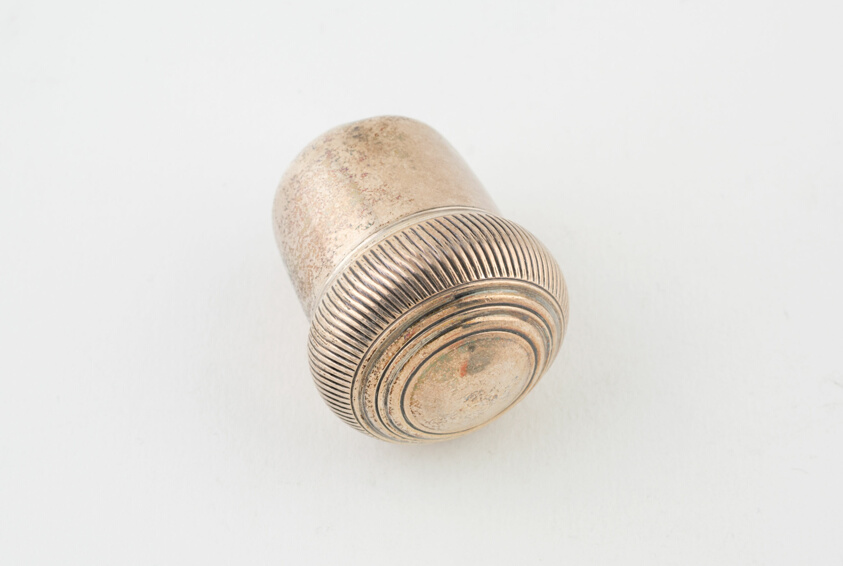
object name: Metalwork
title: Nutmeg Grater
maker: Marked SM; Problably Birmingham, England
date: c. 1800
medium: Silver and iron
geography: Birmingham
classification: container for personal use; box; european decorative arts; metalwork; silver; decorative object/ornament